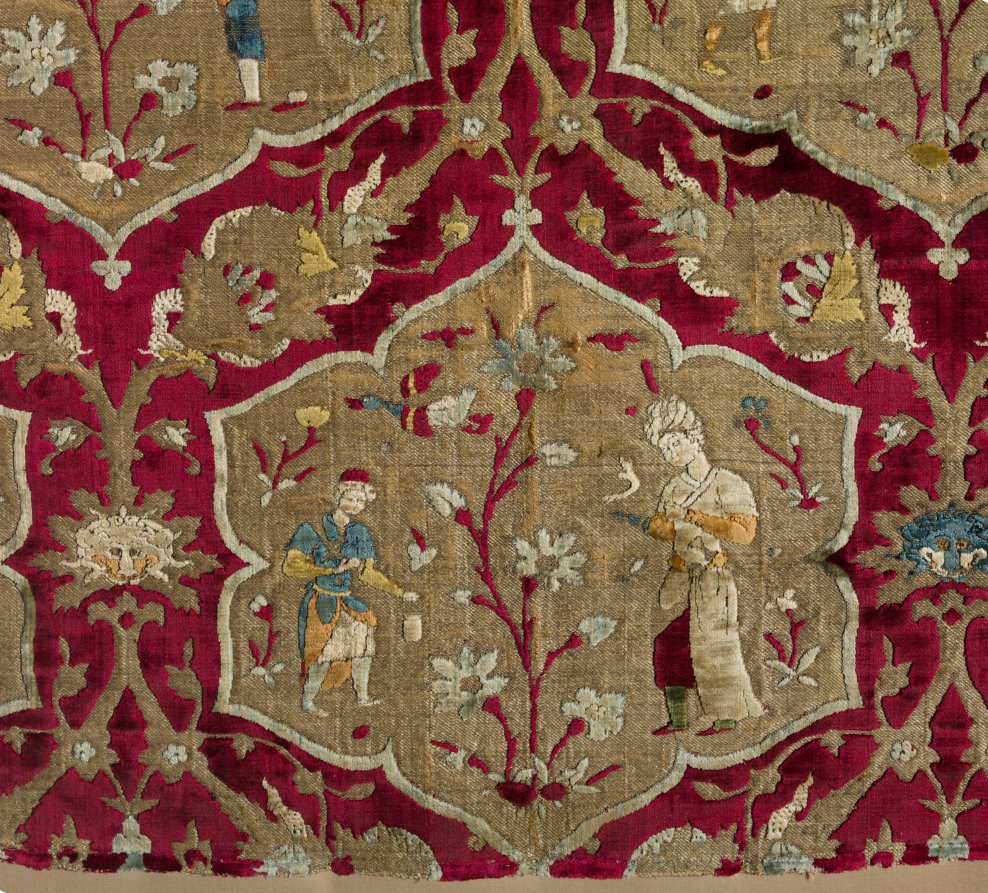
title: Fragment with falconer and attendant in animated lattice, from a robe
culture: Iran, Kashan, Safavid period (1501–1722)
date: mid-1500s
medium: Silk: velvet, brocaded, pile-warp substitution; gilt-metal thread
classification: Velvet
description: This velvet of Iran’s Safavid period (1501–1722) displaying a falconry scene is celebrated for its refined beauty and meticulous draftsmanship. A falconer and attendant flank a blossoming plant on a golden ground of lobed medallions. Animated vines display leaves bearing lion’s masks and dragons coiled around larger leaves on the crimson ground. Instead of two or three colors of velvet, Iranian weavers wove with as many as 14 colors, the most colorful velvets ever woven.